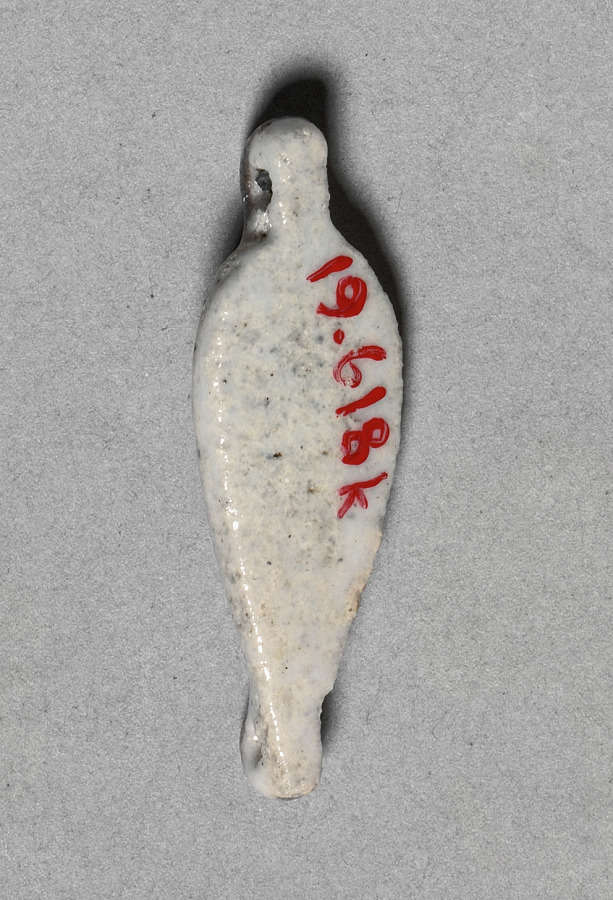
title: Petal-Shaped Bead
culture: Egypt, New Kingdom (1540–1069 BCE), Dynasty 18, reign of Amenhotep III (1390–1352 BCE)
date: c. 1391–1353 BCE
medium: faience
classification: Jewelry